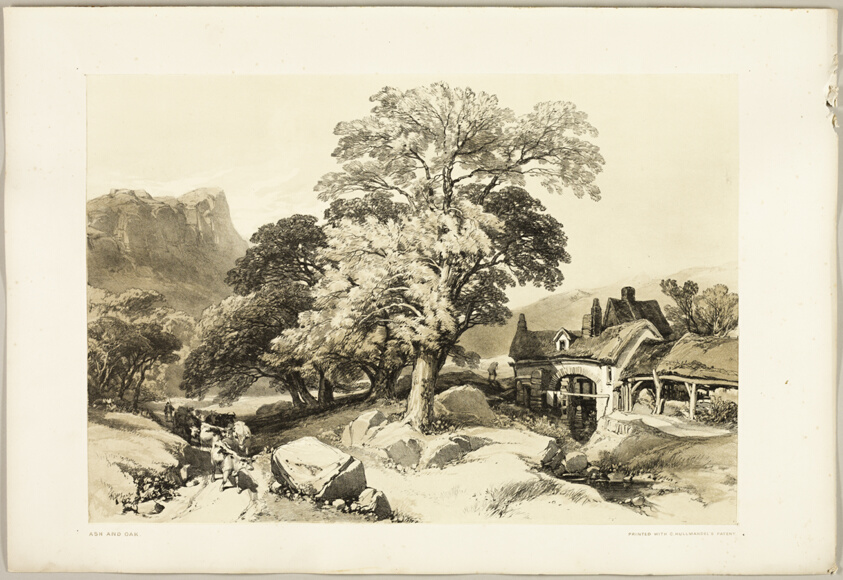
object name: Print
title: Ash and Oak, from The Park and the Forest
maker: James Duffield Harding (English, 1798-1863); printed by Charles Joseph Hullmandel (English, 1789–1850); published by Thomas McLean (English, 1788–1875)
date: 1841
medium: Lithograph in black, with brown tint from a second plate, on ivory wove paper, laid down on ivory wove paper (chine collé)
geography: England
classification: lithograph; print; prints and drawing